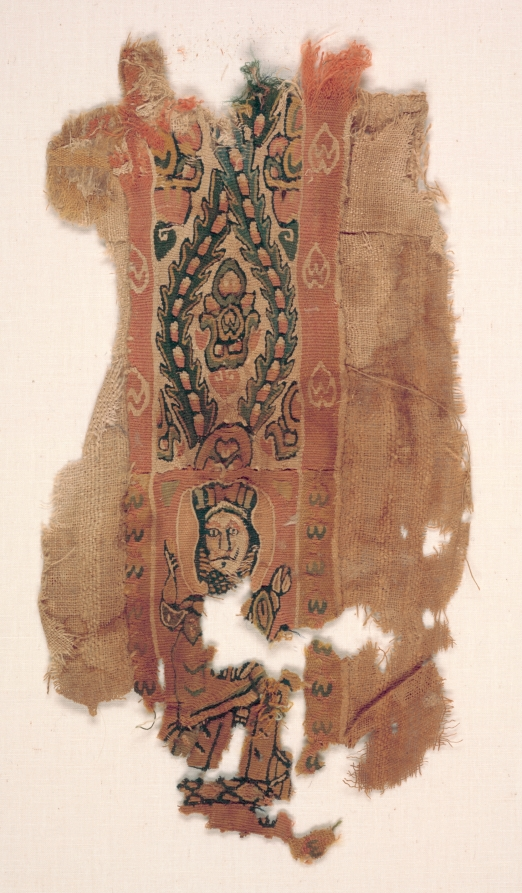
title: Tunic Ornament with Part of a Saint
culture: Egypt, c. 7th - 8th century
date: c. 600s - 700s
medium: tabby weave with inwoven tapestry ornament, linen and wool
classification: Textile